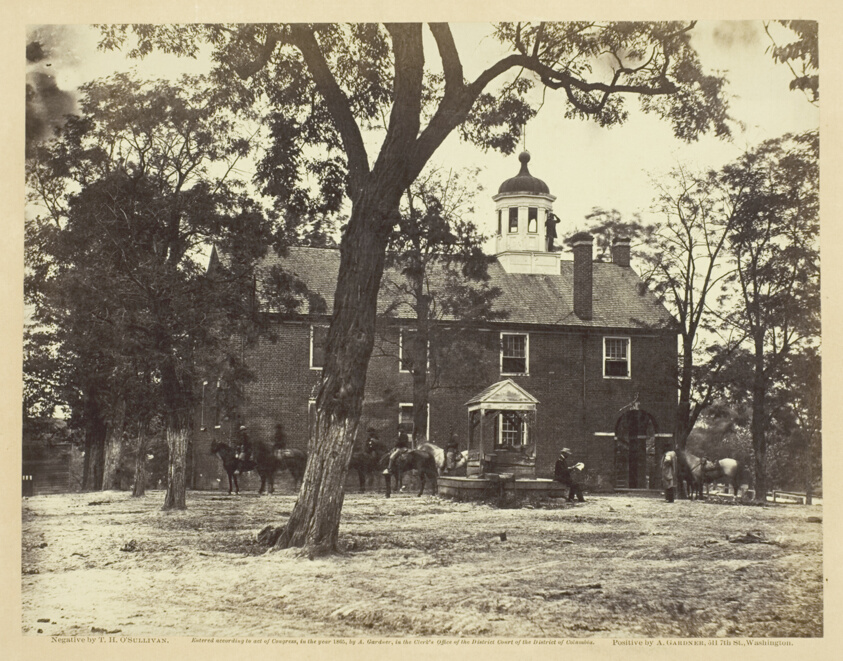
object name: Photograph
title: Fairfax Court-House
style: 19th century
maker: Timothy O'Sullivan (American, born Ireland, 1840–1882)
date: June 1863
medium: Albumen print, pl. 3 from the album "Gardner's Photographic Sketch Book of the War, vol. 1" (1866)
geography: United States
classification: photograph; albumen silver print; photography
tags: Collected by Hugh Edwards, Gardner's Photographic Sketch Book